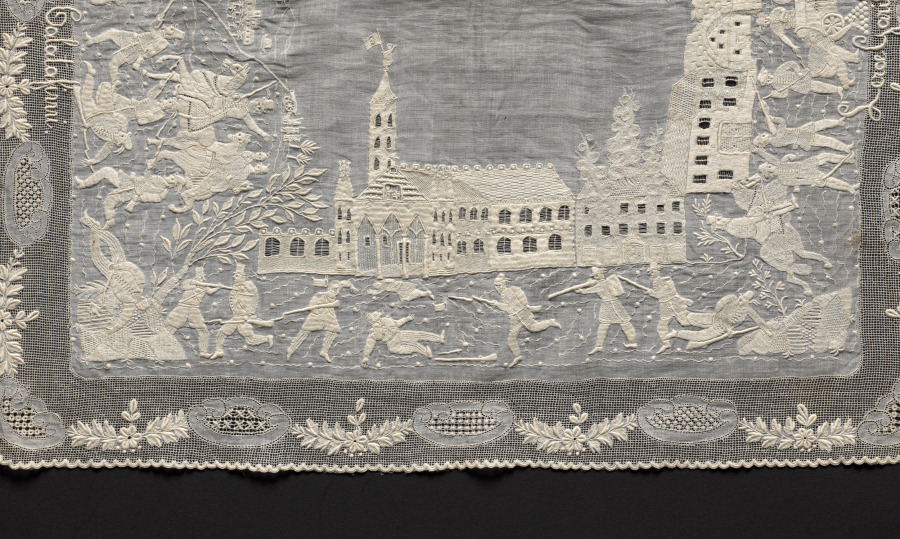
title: Lace Handkerchief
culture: Italy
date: 1850–99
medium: Plain weave cotton (est.): needle lace (cutwork and drawnwork) and embroidery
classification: Embroidery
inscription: on one side: "Combattimento di Calatafimi" and on the other: "L'eroe Garibaldi in Palermo."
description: The embroidery on this handkerchief depicts the Battle of Calatafini in 1860 and the hero Garibaldi in Palermo. The inscription reads: Combattimento di Calatafini" and L'erce Garibaldi in Palermo."